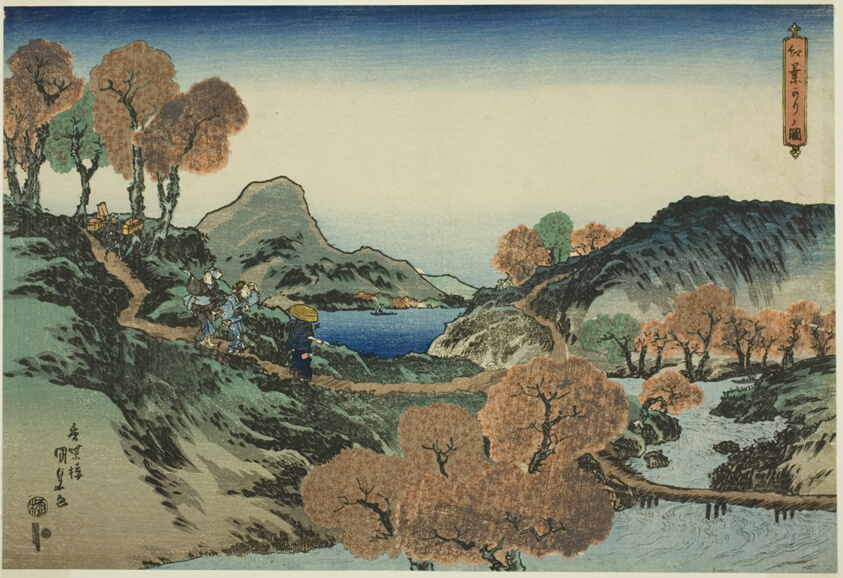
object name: Print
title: Viewing Maple Trees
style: Japanese (culture or style)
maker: Utagawa Kunisada I (Toyokuni III) (Japanese, 1786-1864)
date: 1835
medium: Color woodblock print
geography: Japan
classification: woodblock print; print; asian art